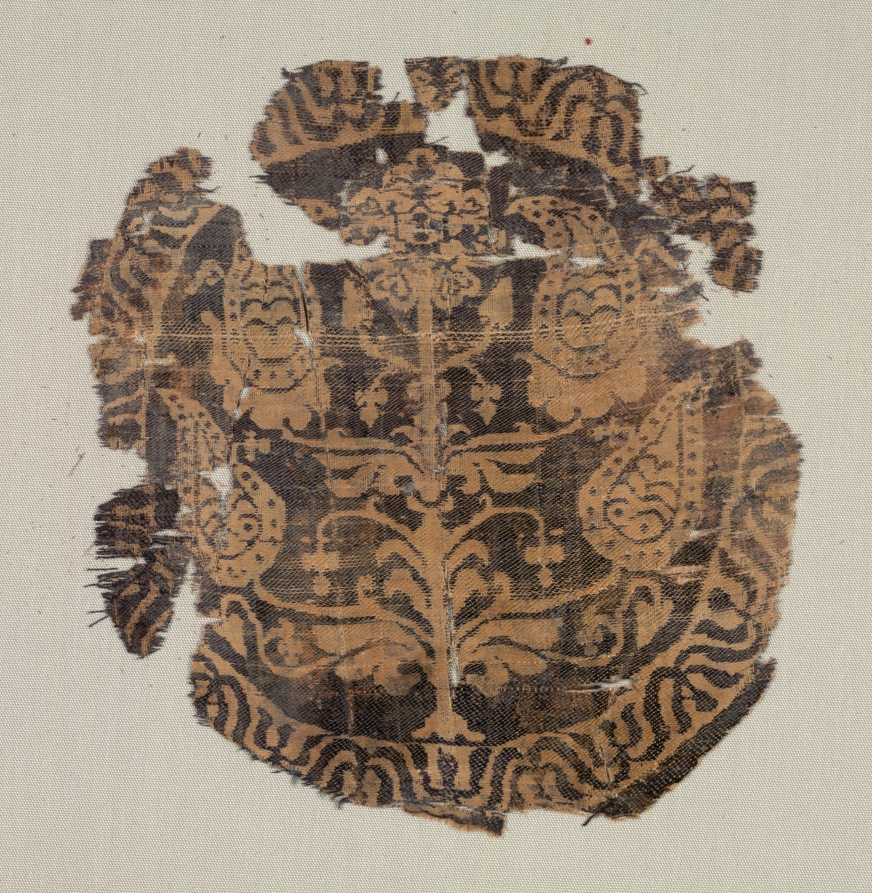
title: Roundel with curvilinear palmette tree, from a tunic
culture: Egypt or Syria(?)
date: 600–850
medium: Silk; complementary weft-faced twill weave with inner warps (samite)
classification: Textile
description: Originally, roundels like this were cut and sewn onto the front and back of a tunic, probably linen, in Egypt. They belong to a sizeable group of comparable silk decorations found in Akhmim, Egypt. In each roundel, a stylized palmette tree is enclosed within a simplified lotus border that evolved from an ancient Egyptian lotus motif.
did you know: This elaborate pattern was woven on a large, early loom known as a drawloom that automatically repeated designs across the width of the fabric.